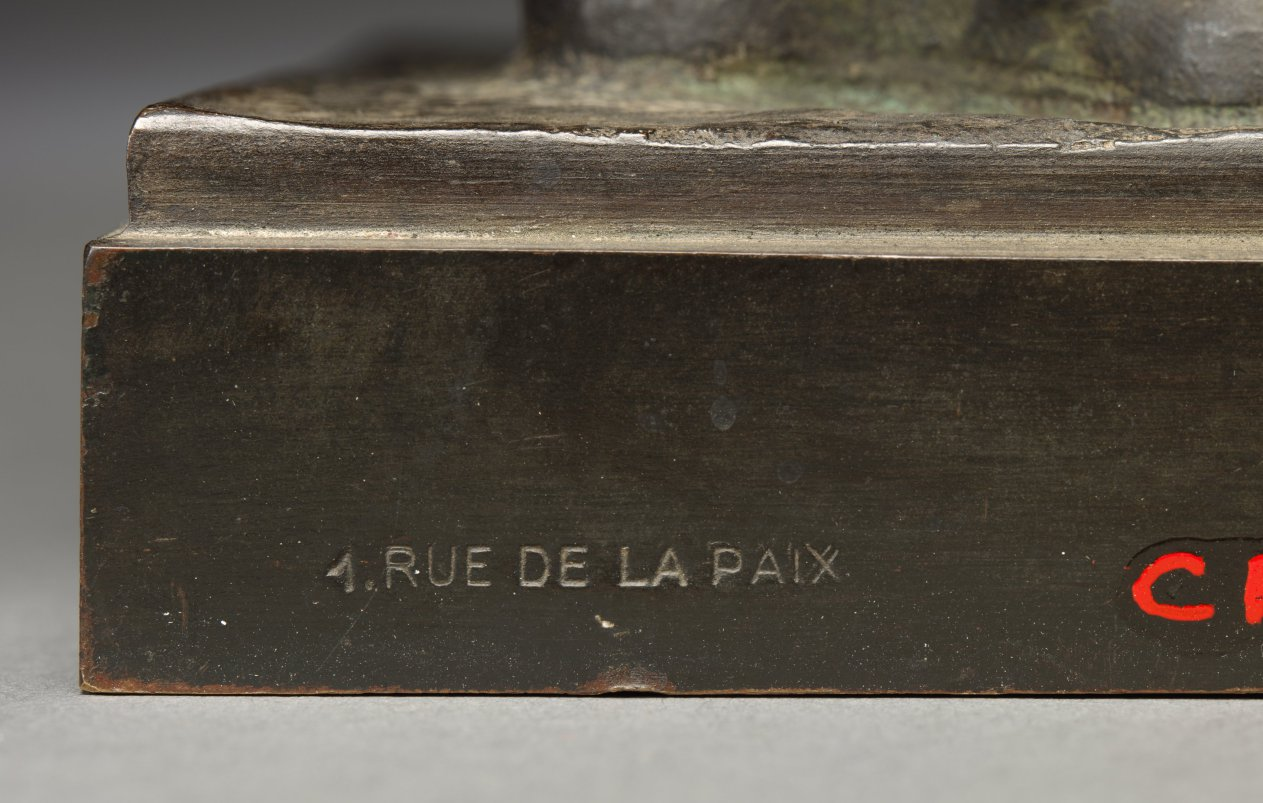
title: Ariadne on a Panther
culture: France, 19th century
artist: Jean-Baptiste Clésinger (French, 1814–1883)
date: 1873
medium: bronze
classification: Sculpture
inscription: signed on side of base: "J. CLESINGER"; inscribed around edge of stamp: "BRONZE ARTISTIQUE/DE PARIS"; on cut of neck of woman, "CAYUZ"; on edge of base: "1 Rue de la PAIX."